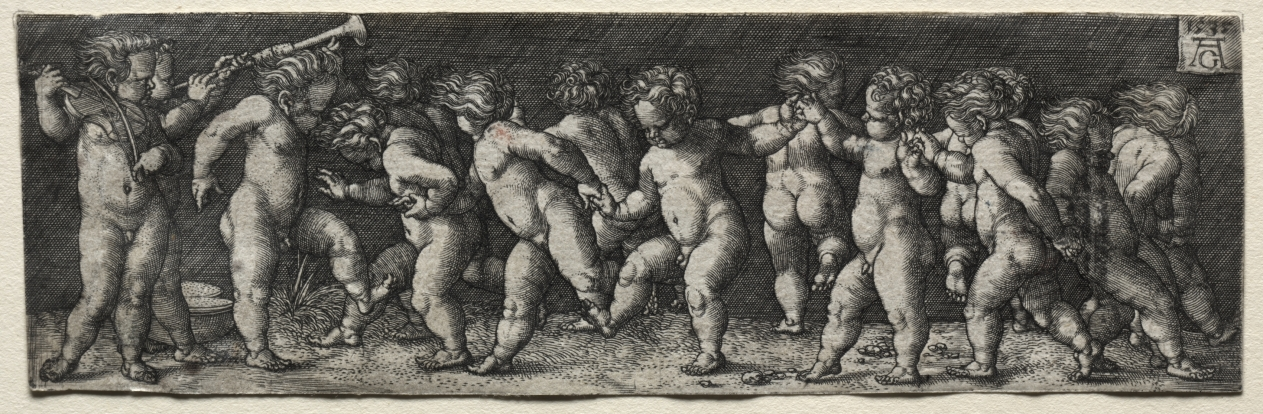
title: Fifteen Nude Children Dancing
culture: Germany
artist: Heinrich Aldegrever (German, 1502–1555/61)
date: 1535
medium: engraving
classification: Print